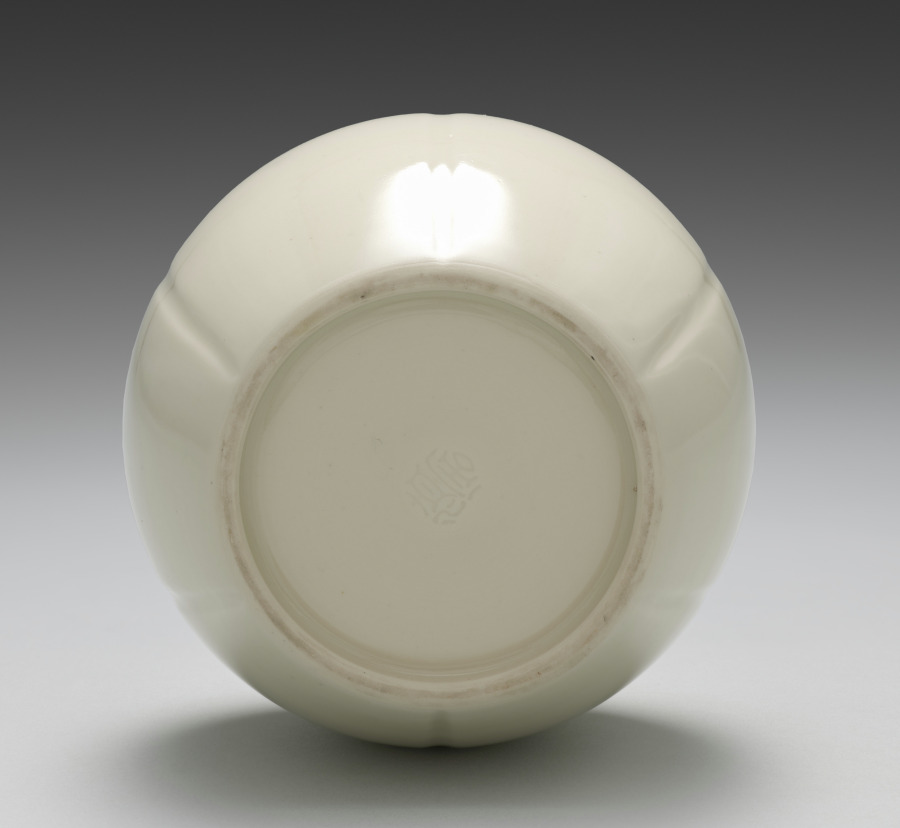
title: Container from Lit Charcoal and Ash Containers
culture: Japan, Meiji period (1868–1912)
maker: Seifū Yohei III (Japanese, 1851–1914)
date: 1893–1914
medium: One from a set of four containers; porcelain with molded design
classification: Ceramic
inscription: 清風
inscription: The storage box for this set is inscribed and impressed with seals.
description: The box lid for these six-lobed lit charcoal and ash containers, or hiire, identifies them as kōhakuji, another of Yohei III’s translucent cream colors over ivory clay bodies. One might translate the name as “lustrous pearl[–glazed ivory] porcelain.” A hiire was filled with ash with burnt coals at the center so that embers and tobacco ash could be discarded safely during a gathering. Each of the lobes on the containers has a round protrusion set below the rim. The studlike pattern is called ruiza. The term is also used to describe the pattern that rings the shoulder of some flower vases or metal kettles used in chanoyu.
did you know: The Seifu studio generally followed the standard practice in Japan for identifying the artist and object in box inscriptions.